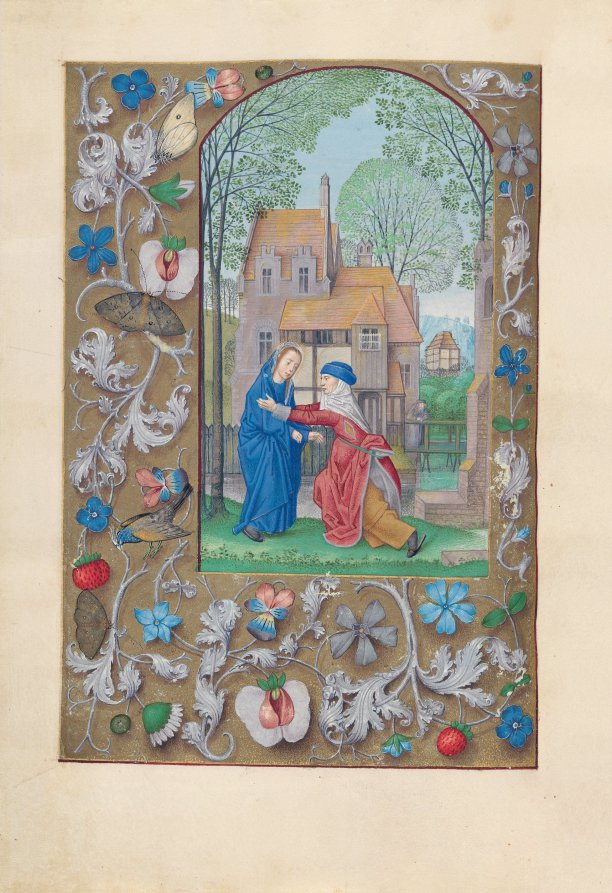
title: Hours of Queen Isabella the Catholic, Queen of Spain: Fol. 115v, Visitation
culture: Flanders, Ghent and Bruges, late 15th century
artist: Master of the First Prayerbook of Maximillian (Flemish, c. 1444–1519)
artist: and Associates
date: c. 1500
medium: ink, tempera, and gold on vellum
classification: Bound Volume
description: This manuscript was illuminated by a circle of at least five highly organized manuscript painters active in the Flemish cities of Ghent and Bruges. The principal illuminator was Alexander Bening, who painted the majority of the book's miniatures. Manuscripts produced by this circle of artists are renowned for the decoration of their borders, which typically feature a rich variety of realistically-painted flowers, birds, and butterflies. This prayer book, called a book of hours, was intended not for a cleric, but for the private devotions of a lay person-in this case, Isabella the Catholic, Queen of Spain (1451-1504). Isabella's coat of arms embellishes the book's frontispiece. It is unlikely that the book was commissioned by the Queen herself; rather, she probably received it as a diplomatic gift from someone courting her patronage, perhaps Cardinal Francisco Jimenez de Cisneros. A Franciscan friar, Jimenez was dependent upon Isabella for his advancement, first to the post of Queen's confessor in 1492, and then to Archbishop of Toledo in 1495.